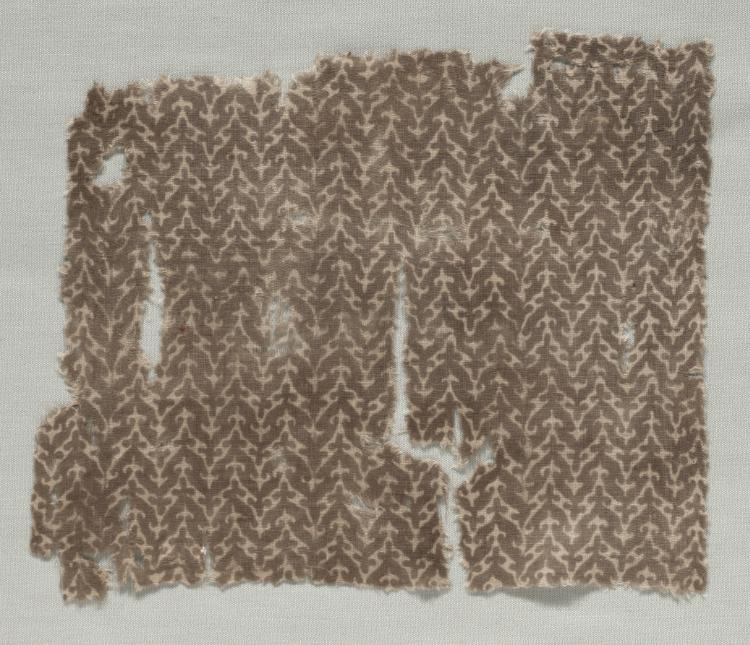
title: Fragment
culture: India, 12th-14th century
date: 1100s - 1300s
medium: plain cloth, resist dyed; cotton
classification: Textile